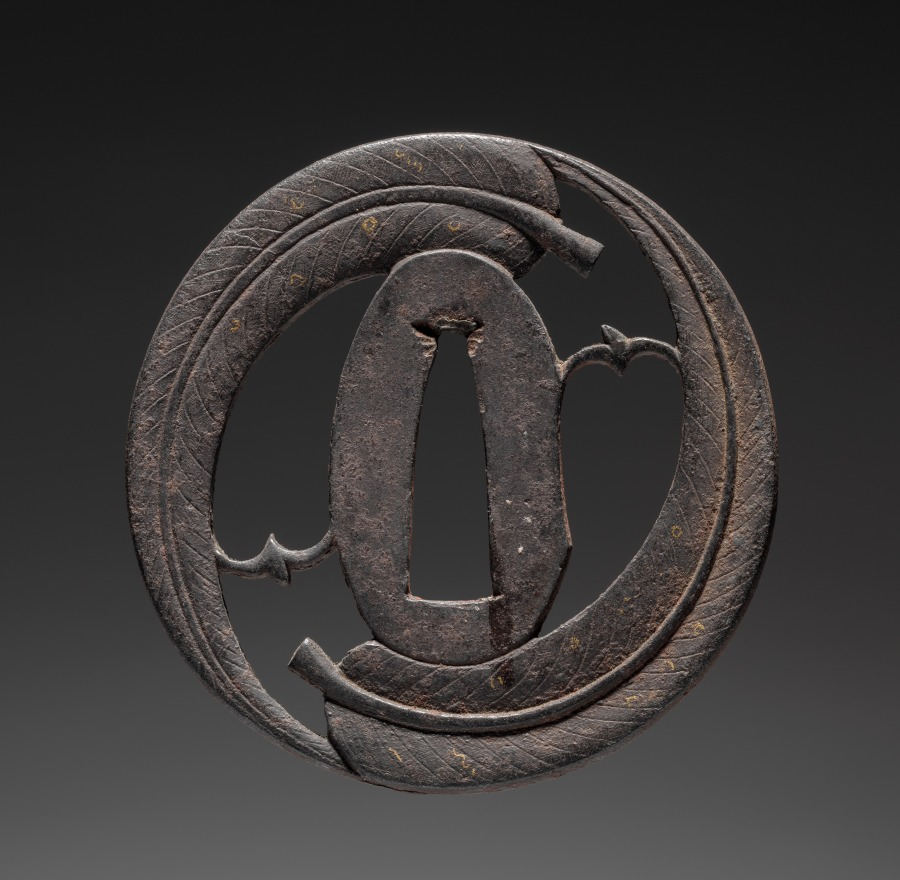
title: Sword Guard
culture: Japan, Edo period (1615–1868)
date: 1615–1868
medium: iron (Chosu type)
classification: Arms and Armor